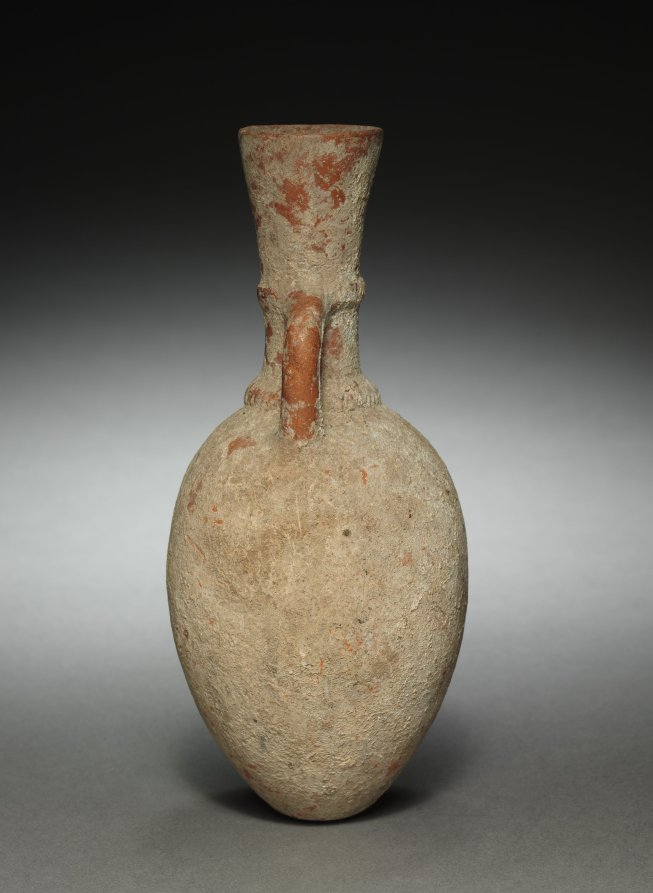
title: Jug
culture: Iran, Amlash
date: c. 1000 BCE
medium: terracotta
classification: Ceramic